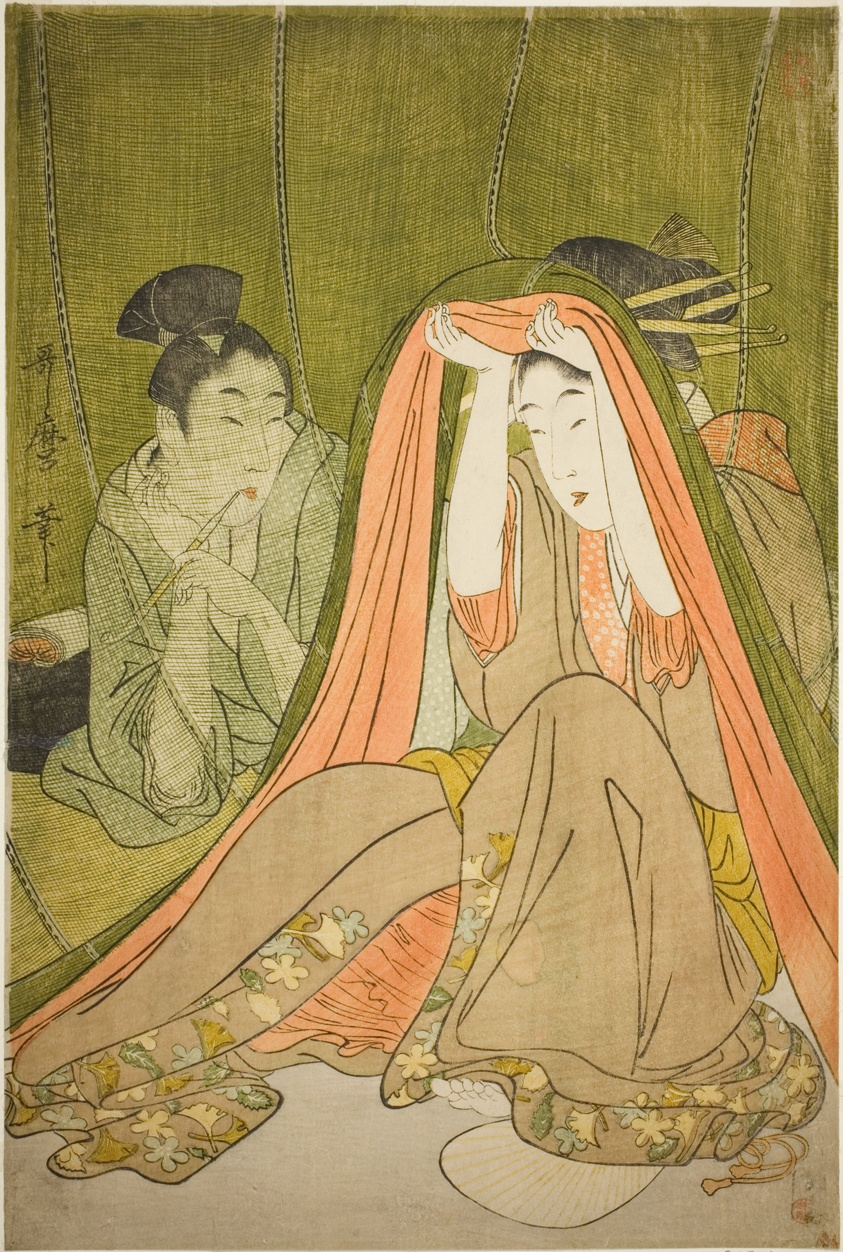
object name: Print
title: Emerging from a Mosquito Net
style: Japanese (culture or style)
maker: Kitagawa Utamaro 喜多川 歌麿; Japanese, 1753 (?)-1806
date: c. 1797/1800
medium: Color woodblock print; oban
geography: Japan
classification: woodblock print; print; asian art